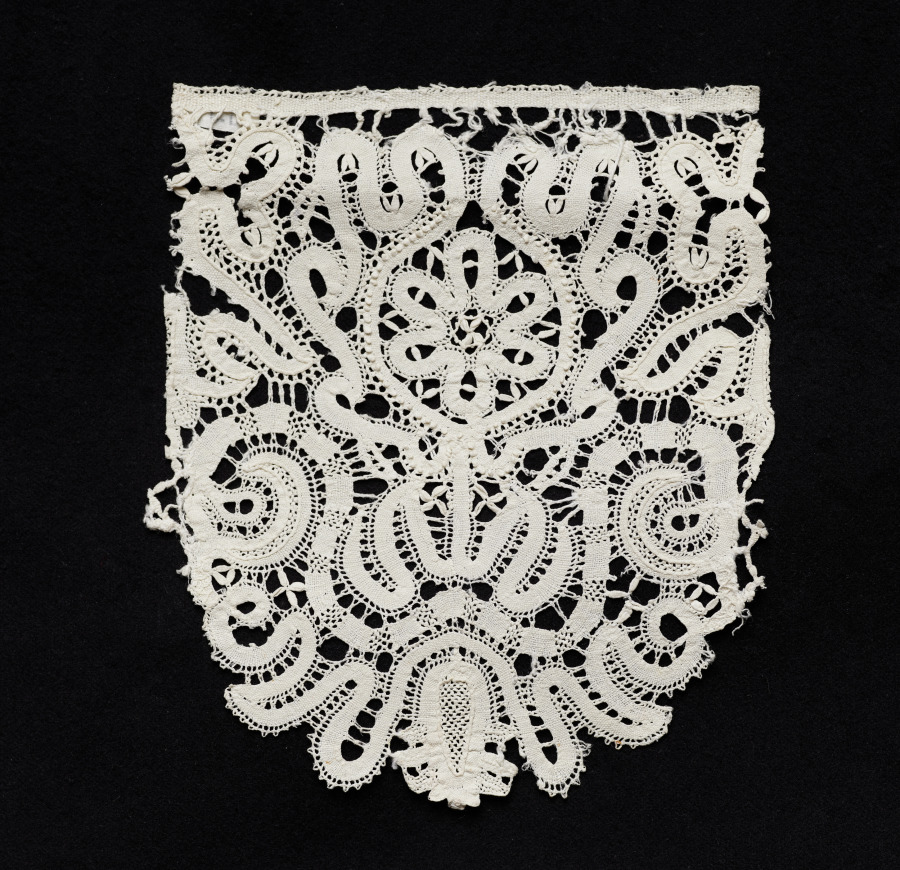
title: Lace Point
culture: Italy, Genoa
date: 1500s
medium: Bobbin Lace (needle lace, punto in aria design)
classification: Lace